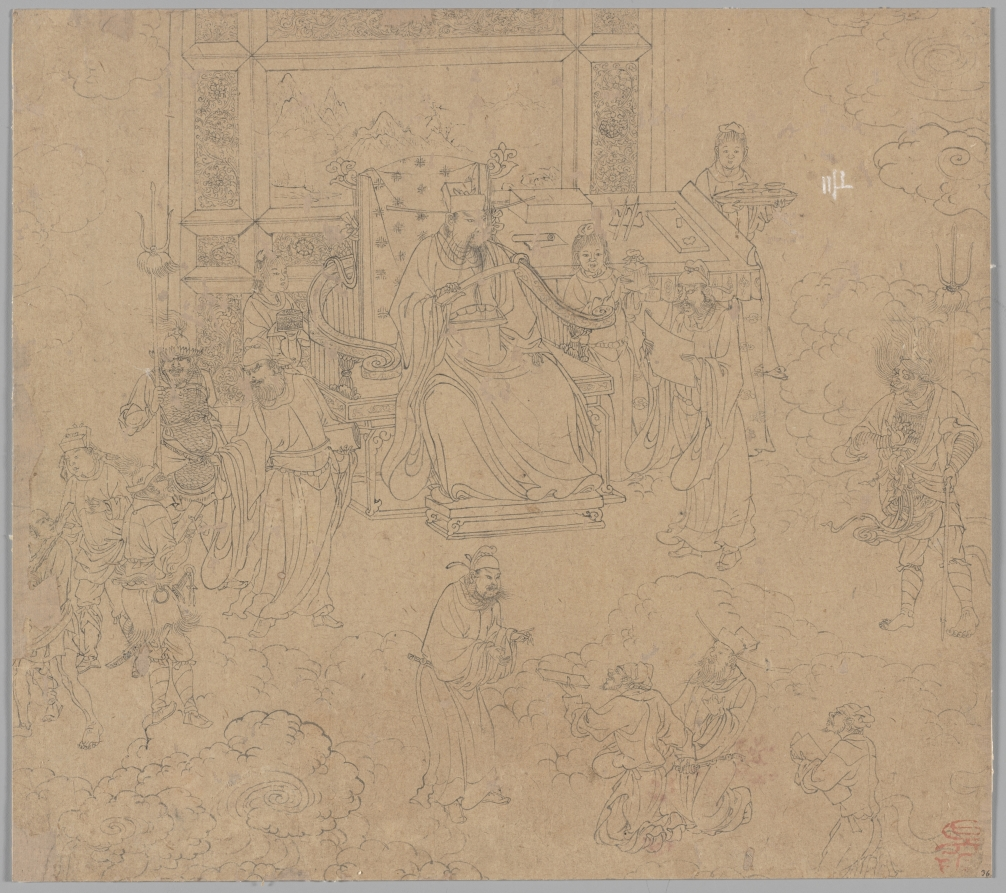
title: Album of Daoist and Buddhist Themes: Kings of Hells: Leaf 36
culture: China, Southern Song dynasty (1127-1279)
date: 1200s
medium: Album, ink on paper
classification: Painting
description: This extraordinary album has 50 paintings on a variety of religious subjects. They were likely created by several master craftsmen to share with studio apprentices as models for fulfilling commissions. The Jade Emperor and the Daoist pantheon make up the first 26 leaves. The next 14 leaves portray the Buddhist Ten Kings of Hell administering punishments to the dead. The third section, called “Clearing the Mountains,” features divine soldiers, led presumably by the deity Erlang Shen 二郎神, fighting undesirable creatures.